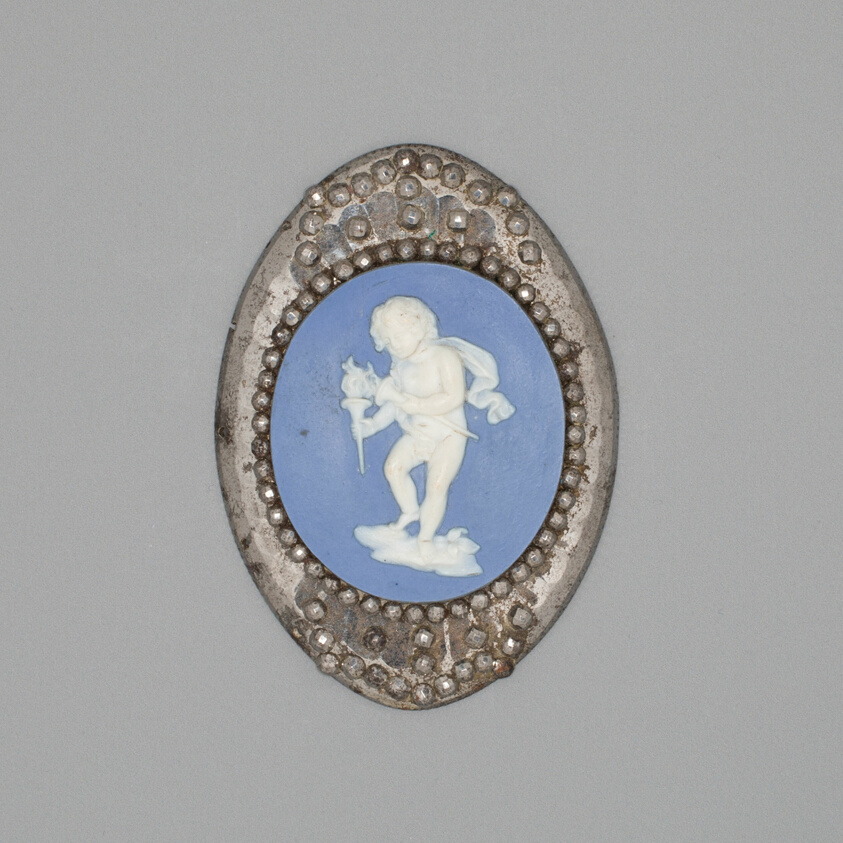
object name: Ceramics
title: Medallion with Cupid Lighting His Wick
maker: Wedgwood Manufactory (England, founded 1759)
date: Late 18th century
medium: Stoneware (jasperware)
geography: Burslem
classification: sculpture; stoneware; european decorative arts; ceramics